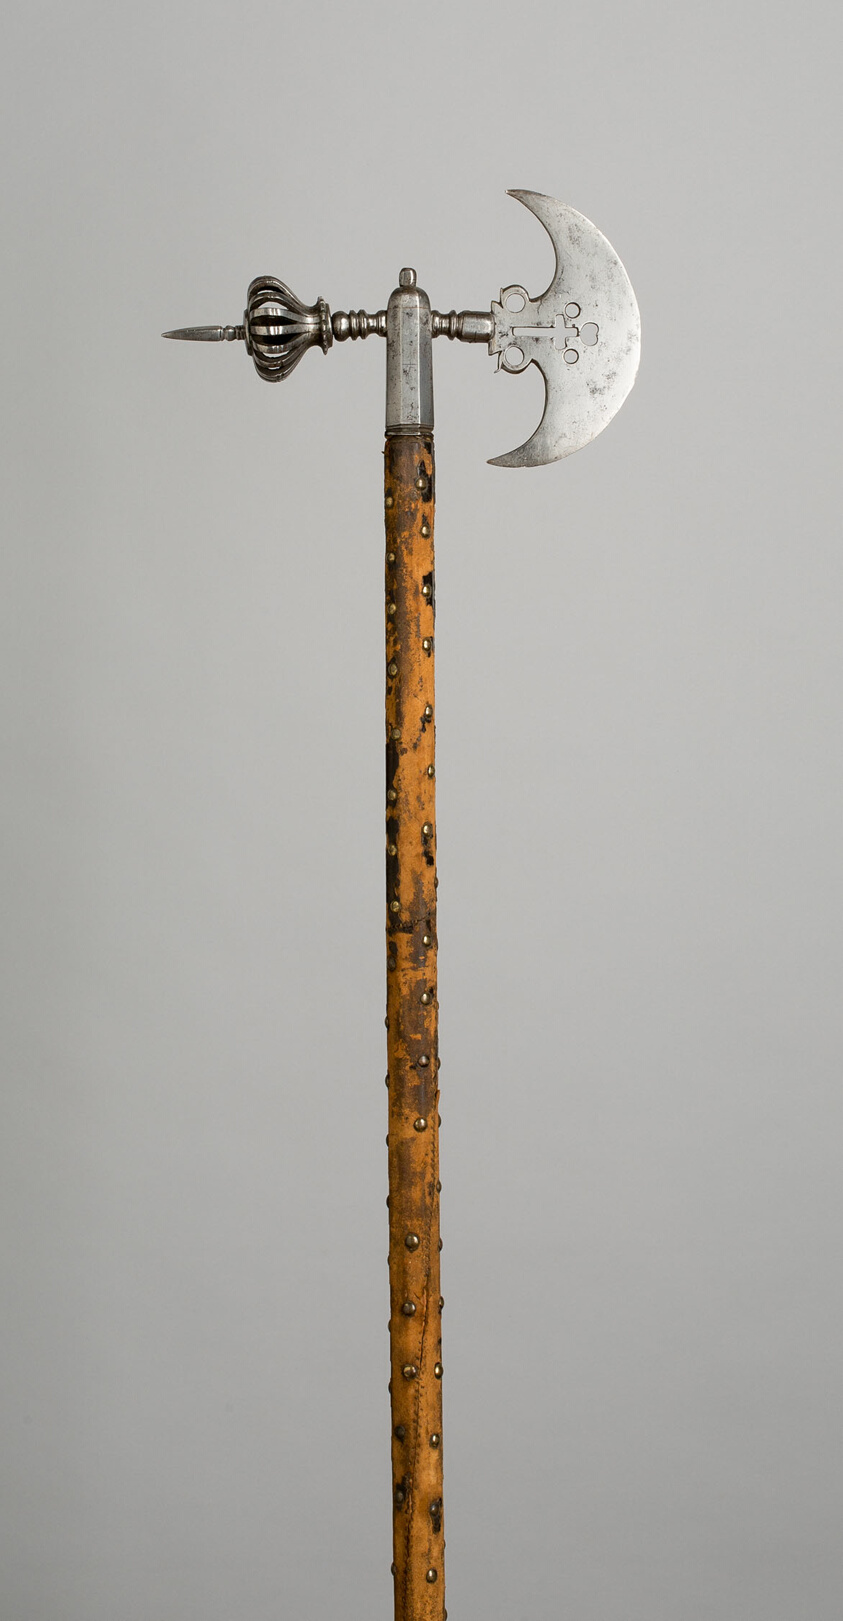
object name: Arms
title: Horseman's Axe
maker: Western European, possibly French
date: 1600/1700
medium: Steel, wood (oak), leather, and brass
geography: Western Europe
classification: edged weapon-staff; arms; arms and armor